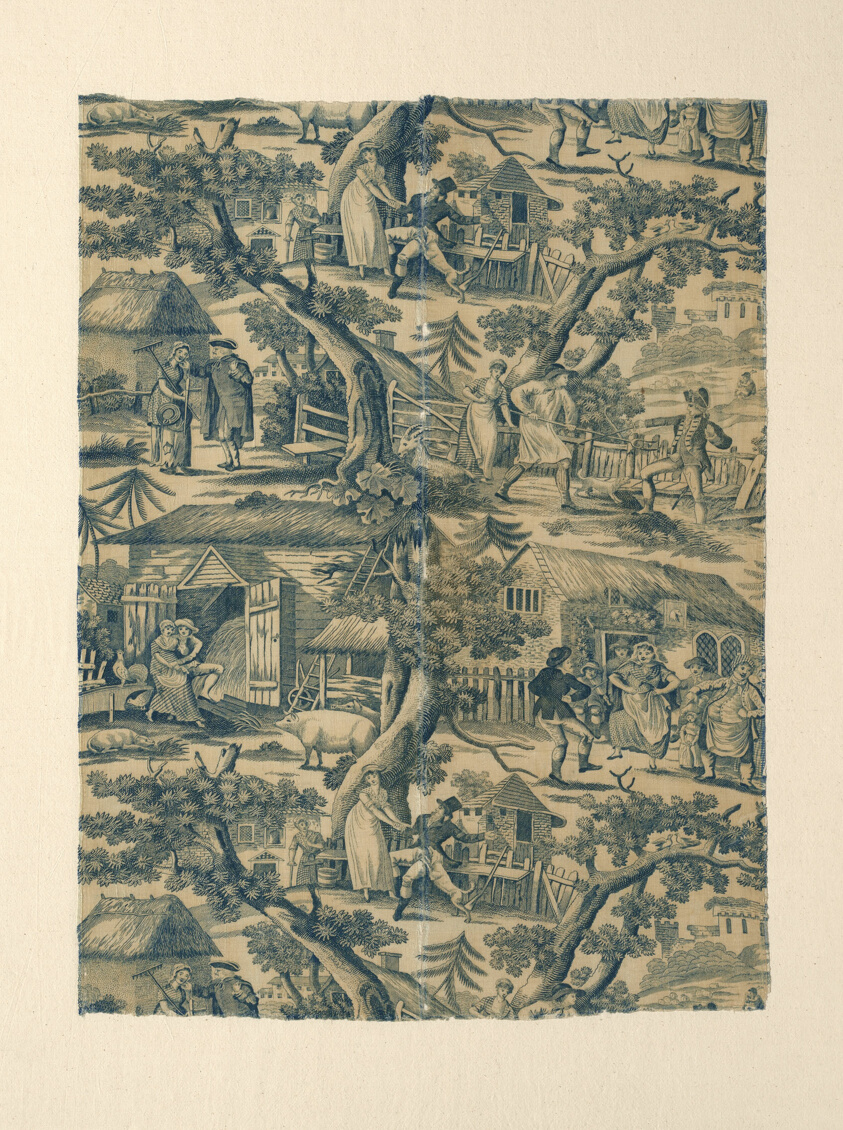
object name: Textile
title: Fragment (Furnishing Fabric)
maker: Manufactured for John Marshall (English, active 1818–1824); England, Manchester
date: c. 1820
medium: Cotton, plain weave; probably copperplate printed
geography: Manchester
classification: textile; weaving - printed; furnishing textile